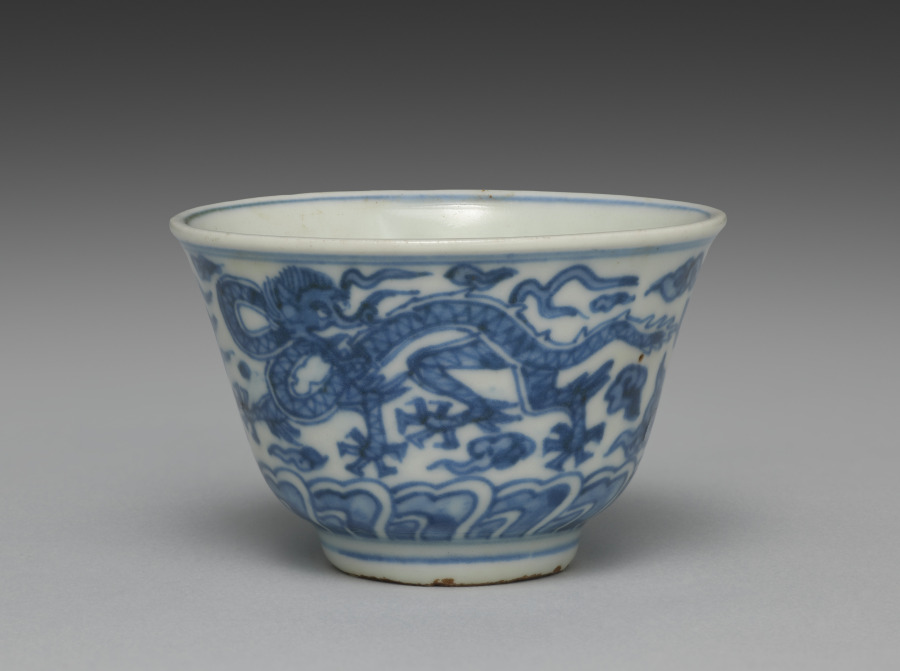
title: Cup from Tea Cups with Dragons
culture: Japan, Edo period (1615–1868)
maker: Seifū Yohei I (Japanese, 1801–1861)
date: 1840s–57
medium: One from a set of five tea cups; porcelain with underglaze blue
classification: Ceramic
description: Seifū Yohei I made both blue and white porcelains after Ming dynasty (1368–1644) Chinese wares fired in the kilns at Jingdezhen for export. He also made colorful stoneware in the style of his teacher, Nin’ami Dōhachi (Takahashi Dōhachi II) (1783–1855).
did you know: A small figure of an elephant serves as the handle for the lid.